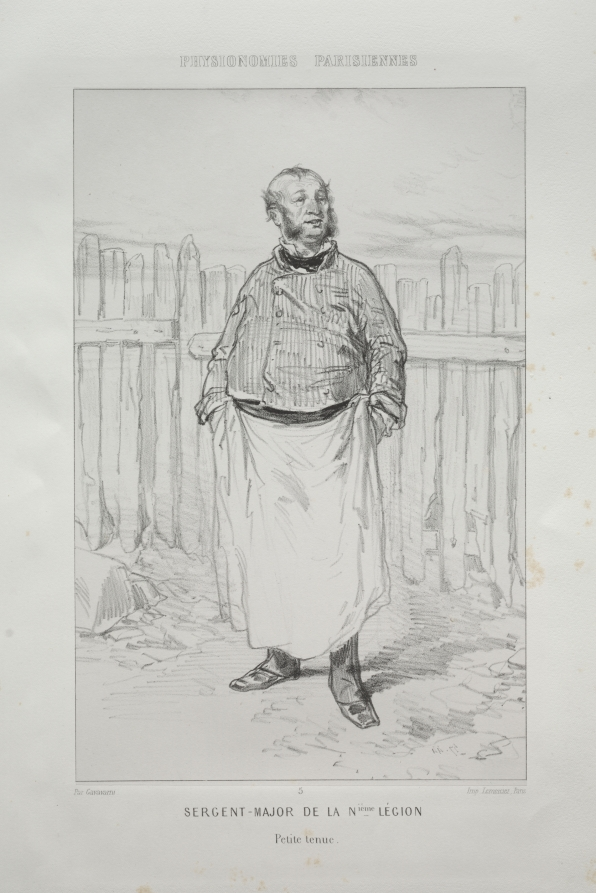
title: Sergent - Major de la Nième Légion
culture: France, 19th century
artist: Paul Gavarni (French, 1804–1866)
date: 1857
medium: lithograph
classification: Print